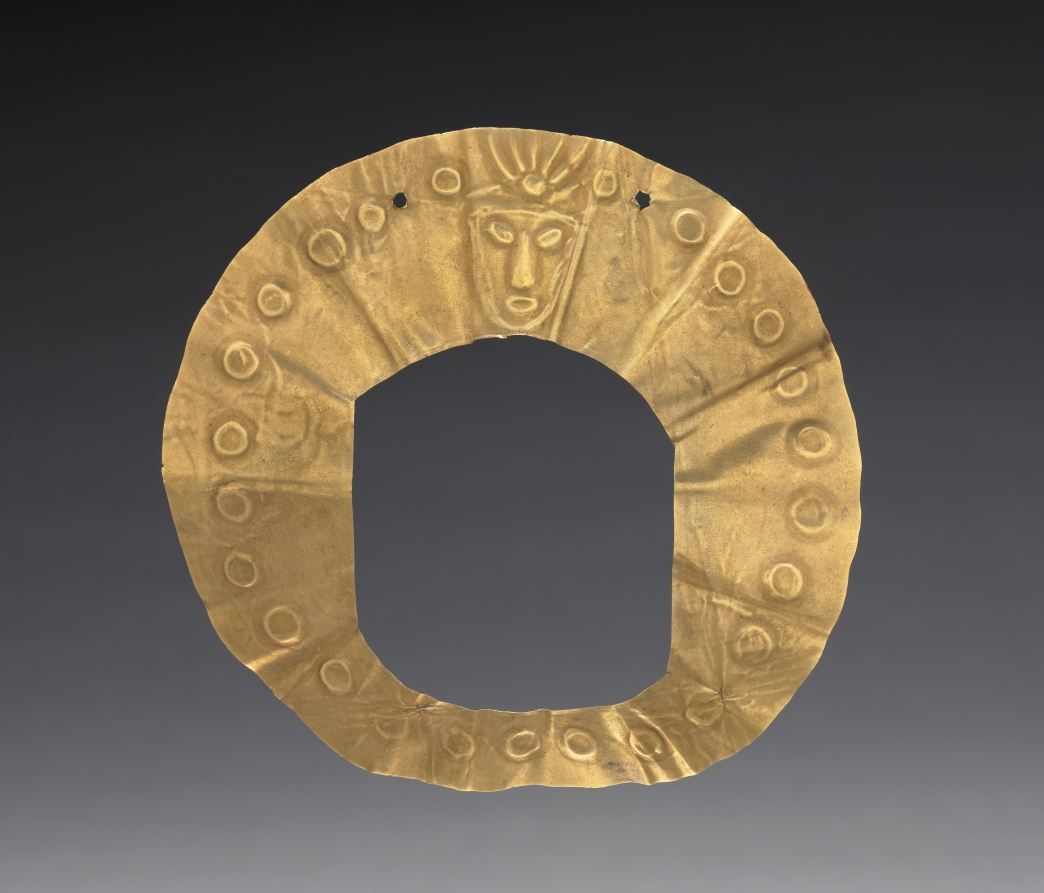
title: Disk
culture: Peru, Nasca(?)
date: 300–600? CE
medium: hammered and cut gold with repoussé design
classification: Sculpture